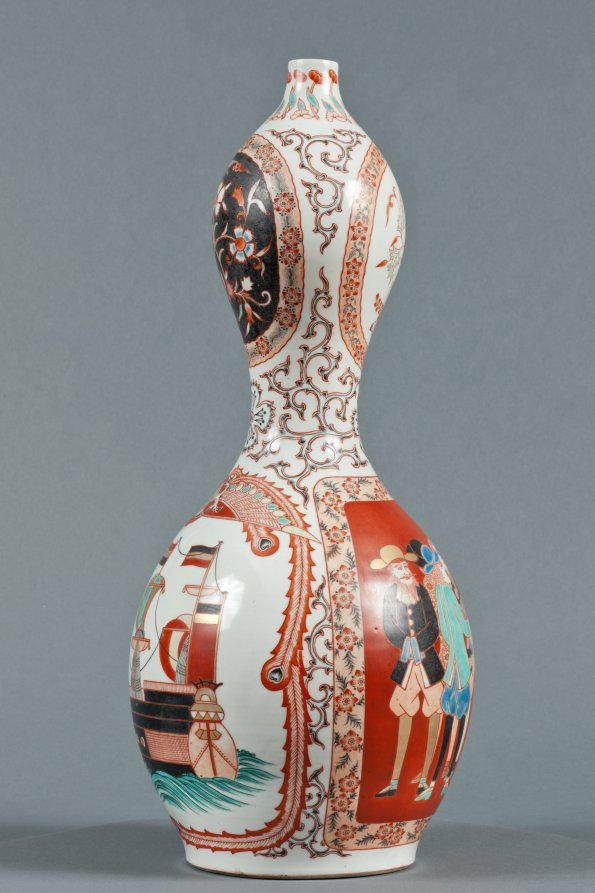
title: Bottle with Western Ships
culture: Japan, Edo period (1615–1868)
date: c. 1800–1868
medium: Porcelain with decoration in colored enamels and underglaze blue, overglaze enamels, and gold (Hizen ware, Arita type)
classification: Ceramic